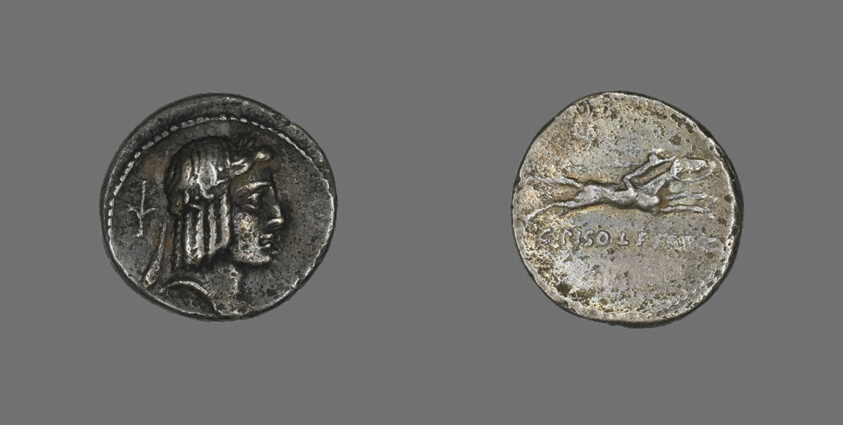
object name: Coin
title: Denarius (Coin) Depicting the God Apollo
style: roman (ancient, style or period), ancient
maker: Roman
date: about 67 BCE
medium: Silver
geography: Roman Empire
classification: coin; ancient art